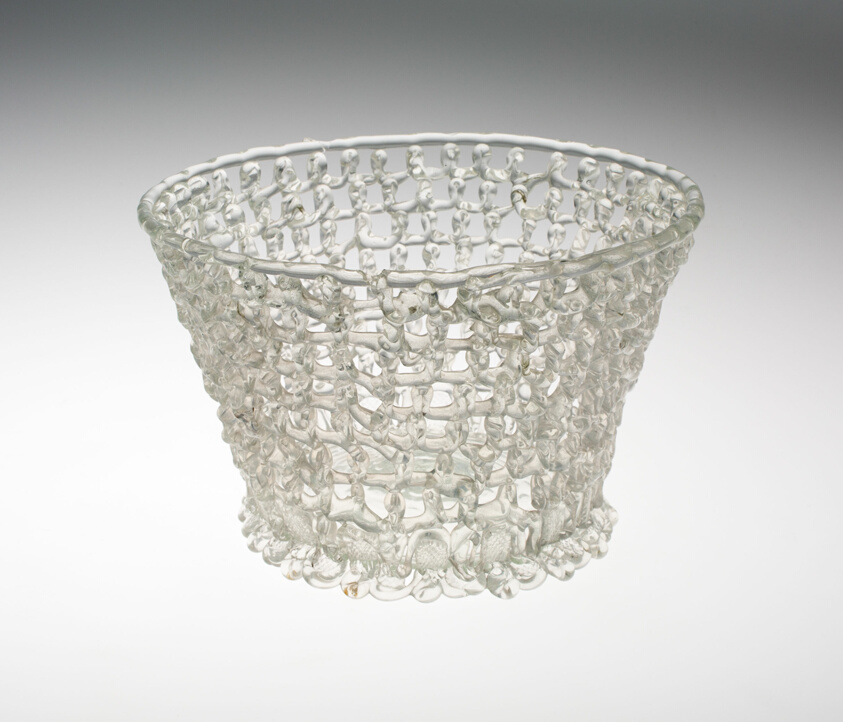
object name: Glass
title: Bowl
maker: Liège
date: 18th century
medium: Glass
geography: England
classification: bowl; glass; dish (vessel); european decorative arts